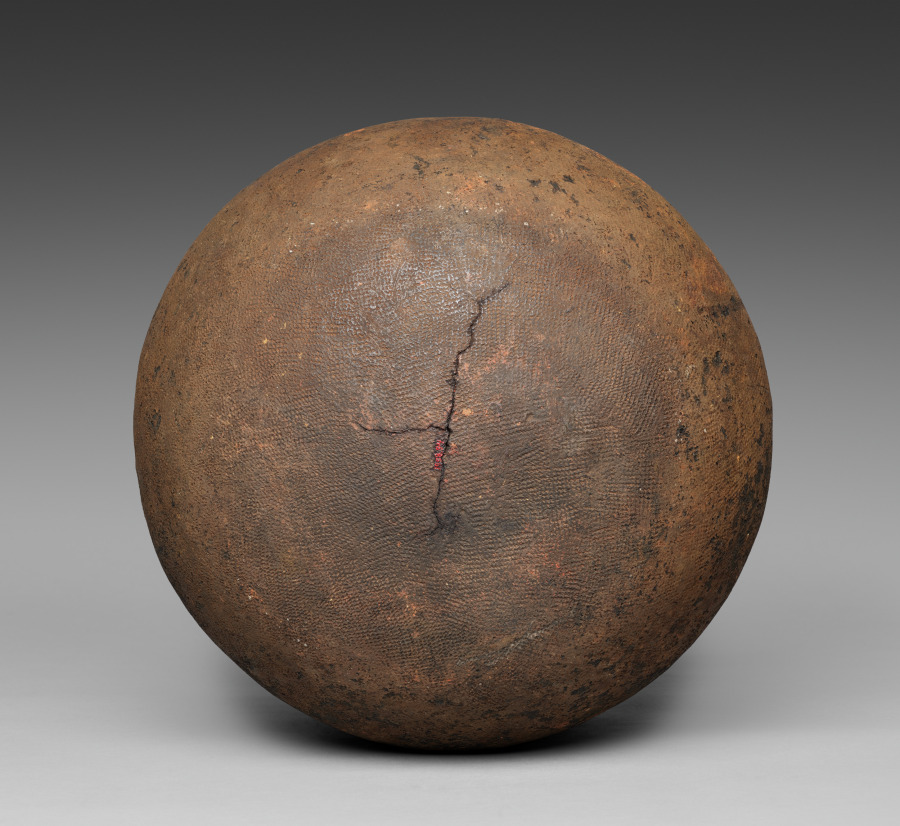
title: Palm Wine Vessel (kuh mendu)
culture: Probably Babessi or Bamessing, Cameroon, Cameroon Grassfields-style pottery, unknown female ceramicist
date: 1900s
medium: Terracotta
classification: Vessels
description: Made by a female potter nearly a century ago, this palm wine vessel represents past and present cultural practices in the Cameroon Grassfields (northwest and western Cameroon). Women in the pottery-producing centers of Babessi and Bamessing hand-built these vessels. Their process alludes to pregnancy, labor, and delivery. Passing knowledge from mother to daughter since at least the 1700s, making pottery is a female economic, social, and artistic contribution. Yet many motifs refer to royal or male power, such as the lizards on this vessel. Elegant palm wine vessels like this were appropriate for ritual and hospitality in Cameroon Grassfields royal courts.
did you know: Serving and sharing palm wine in decorated vessels like this is part of a larger food culture in the Cameroon Grassfields kingdoms that centers on ritual, hospitality, status, and diplomacy.